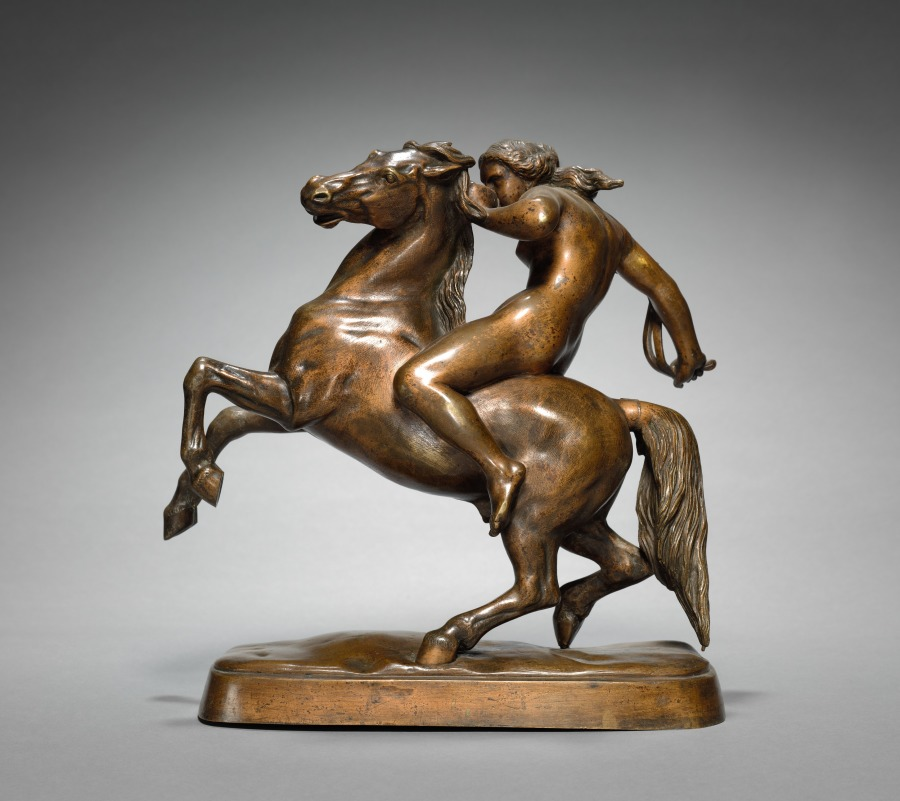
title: Amazon Taming a Horse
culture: France, 19th century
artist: Jean-Jacques Feuchère (French, 1807–1852)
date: c. 1840–1843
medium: bronze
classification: Sculpture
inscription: signed on base: "J. FEUCHÈRE"